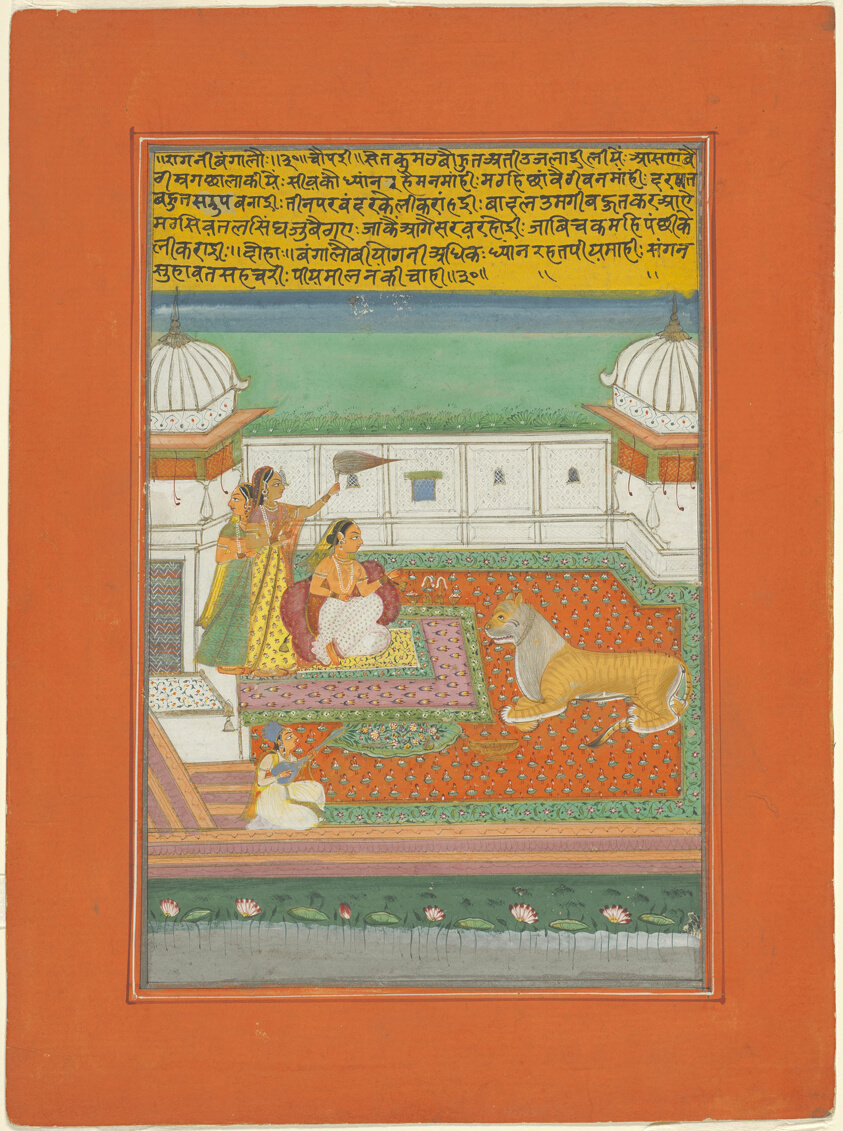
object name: Painting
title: Ragini Bangali, Page from a Jaipur Ragamala Set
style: South Asian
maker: India; Rajasthan, Jaipur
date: c. 1750-1770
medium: Opaque watercolor and gold on paper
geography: Rajasthan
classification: miniature painting; painting; asian art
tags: music, musicians